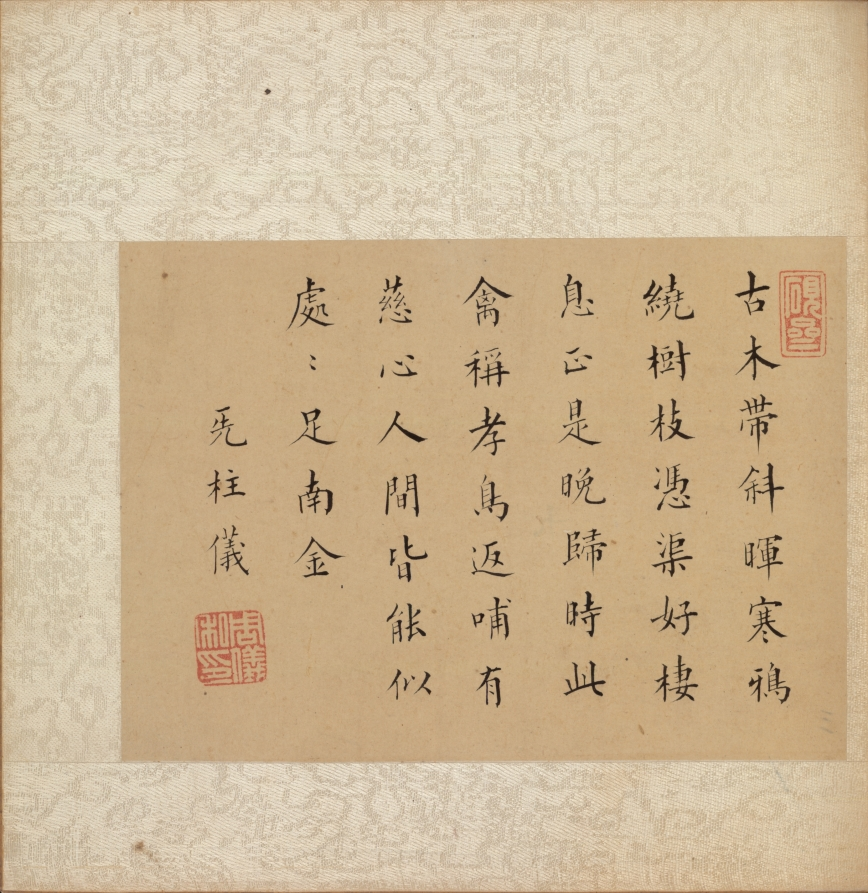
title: Album of Miscellaneous Subjects, Leaf 9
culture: China, Qing dynasty (1644-1911)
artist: Fan Qi (Chinese, 1616–after 1694)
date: early 1650s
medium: album leaf, ink and color on silk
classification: Painting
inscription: Artist seal: Fan Qi 樊圻. Poem by Zhou Yi 周儀 (mid 17th century–about 1705): Ancient trees share the slanting rays of the setting sun/ Chilly ravens hover round their branches/ The leader of the flock thinks this is a good place to rest,/ Evening being the time for returning./ This flock is the so-called a filial crow,/ Who, in disgorging their food [to feed their young], have compassionate hearts,/ Were the people in the world all like this,/ Fine talent would be everywhere.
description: Leaf 9 Zhou Yi's colophon reads: Ancient trees share the slanting rays of the setting sun. Chilly ravens hover round their branches. The leader of the flock thinks this a good place to rest, Evening being the time for returning. This flock is the so-called filial crow, Who, in disgorging their own food [to feed the young], have compassionate hearts. Were the people in the world all like this, Fine talent would be everywhere.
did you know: The winter landscape turns ocher at dusk, and the birds roost for the night.